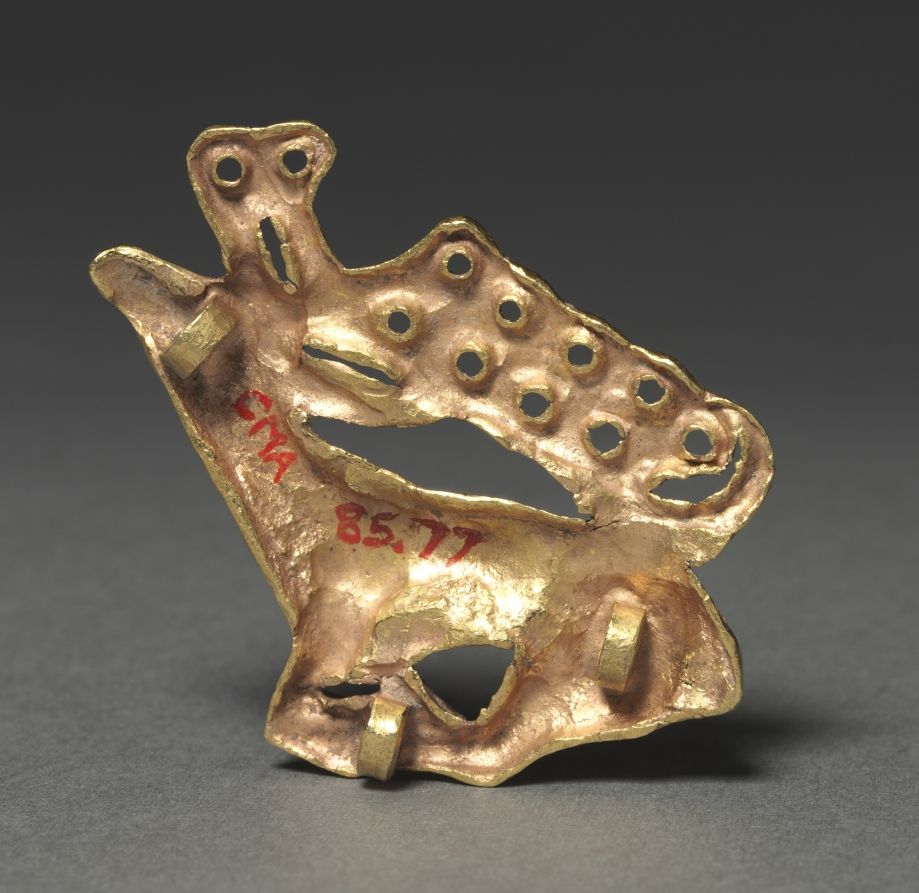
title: Stag Plaque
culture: Western Asia, Scythian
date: 400–300 BCE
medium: gold, cast in shell mold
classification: Sculpture